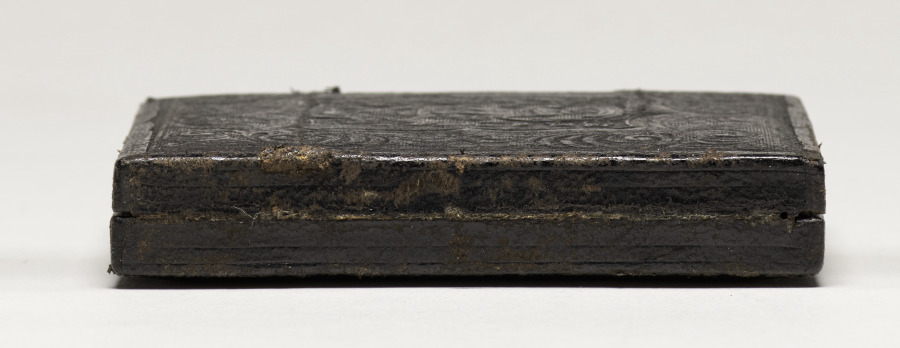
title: Two Oxen and Driver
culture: America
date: 1850s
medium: daguerreotype, sixth plate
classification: Photograph